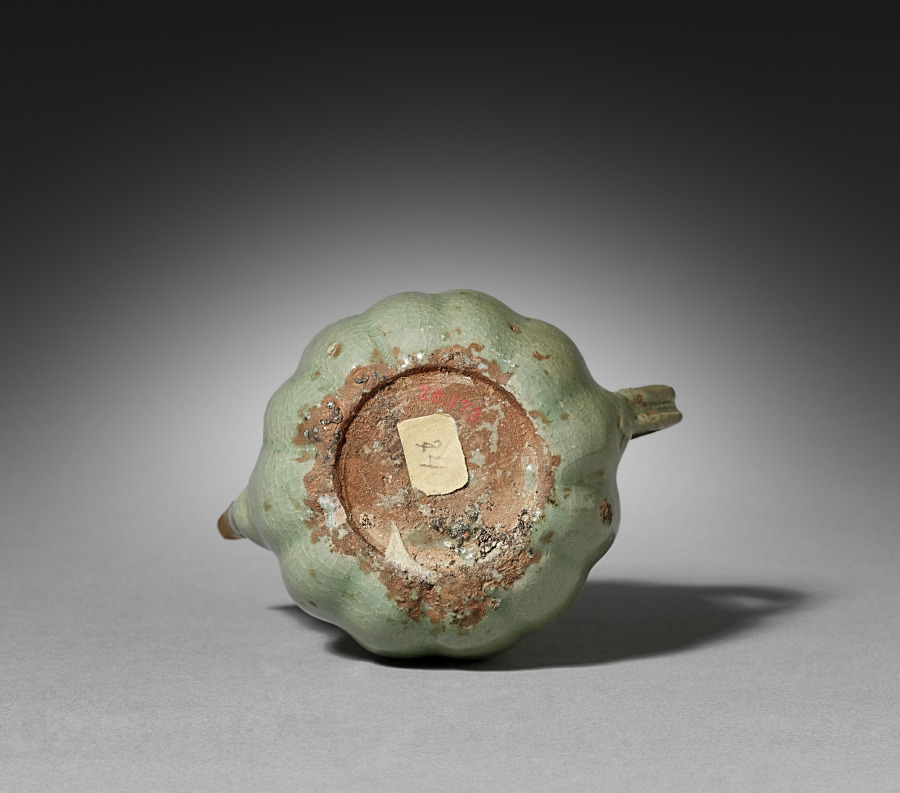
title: Melon-shaped Wine Ewer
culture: Korea, Goryeo dynasty (918–1392)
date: 1100s-1200s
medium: celadon ware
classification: Ceramic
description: Many celadon ceramics, such as these two miniature pots, have been repaired with gold lacquer. Termed kintsugi (literally meaning “gold joinery”) in Japanese, this restoration method highlights broken parts with glittering gold mixed with lacquer. Initiated in 15th-century Japan, the technique follows a popular aesthetic concept called wabi-sabi, which finds beauty in imperfect things. Goryeo celadons were considered rare treasures among early 20th-century Japanese collectors; thus, their broken condition is brilliantly highlighted in gold lacquer, as seen here in the repaired spouts, handle, and lid.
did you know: This miniature wine pot was buried in a tomb for the soul of the deceased.